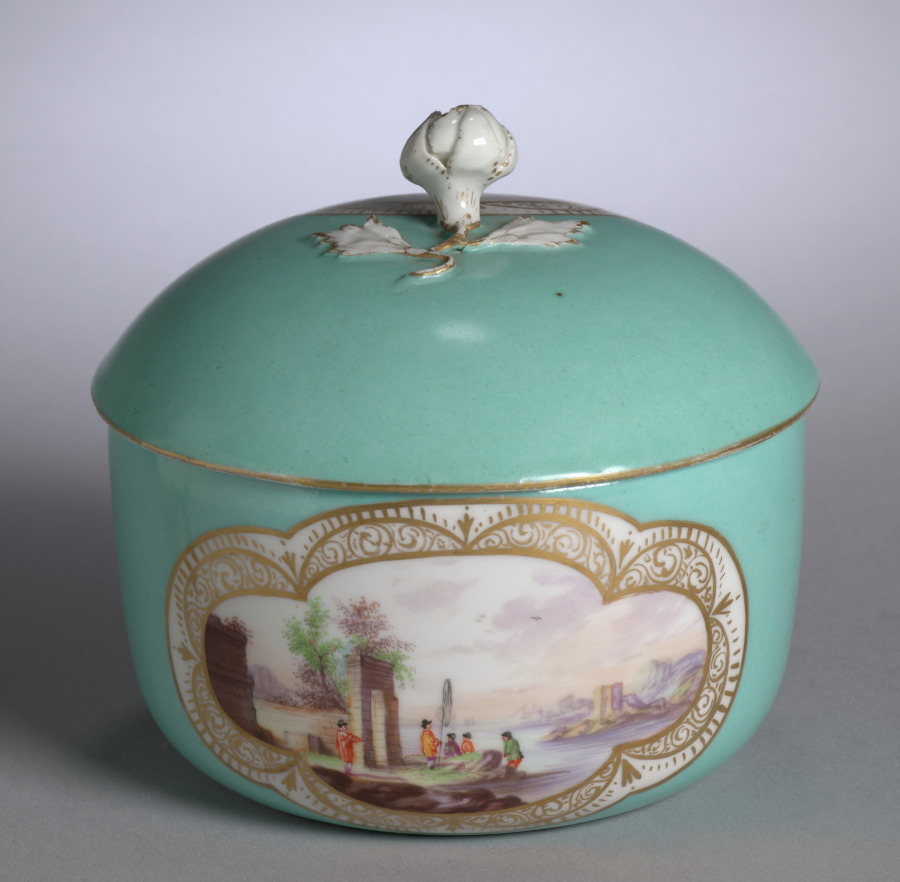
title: Sugar Bowl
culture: Germany, Meissen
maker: Meissen Porcelain Factory (German, est. c. 1710)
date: c. 1750–70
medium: porcelain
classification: Ceramic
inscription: Half moon mark on the bottom.